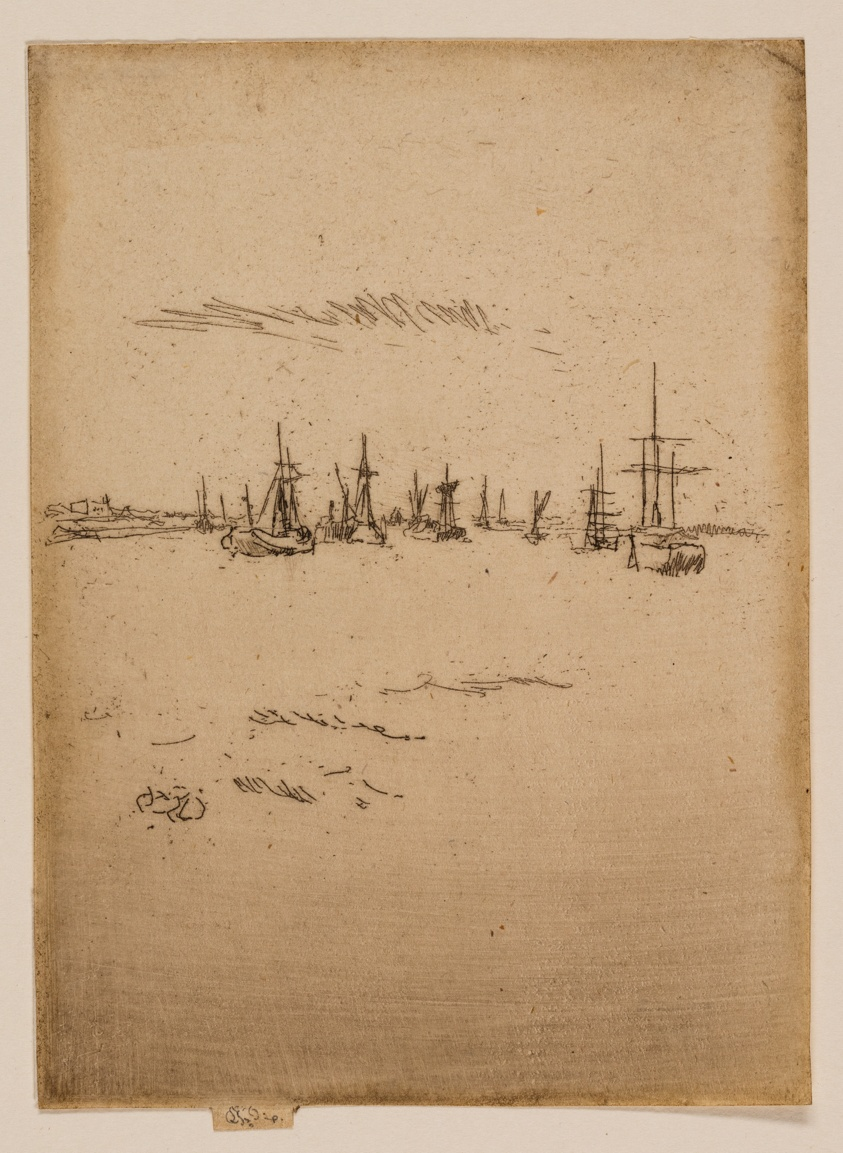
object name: Print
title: Return to Tilbury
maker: James McNeill Whistler (American, 1834-1903)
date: 1887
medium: Etching and drypoint with foul biting in black ink on cream laid paper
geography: United States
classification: etching; foul biting; print; prints and drawing; drypoint; paper